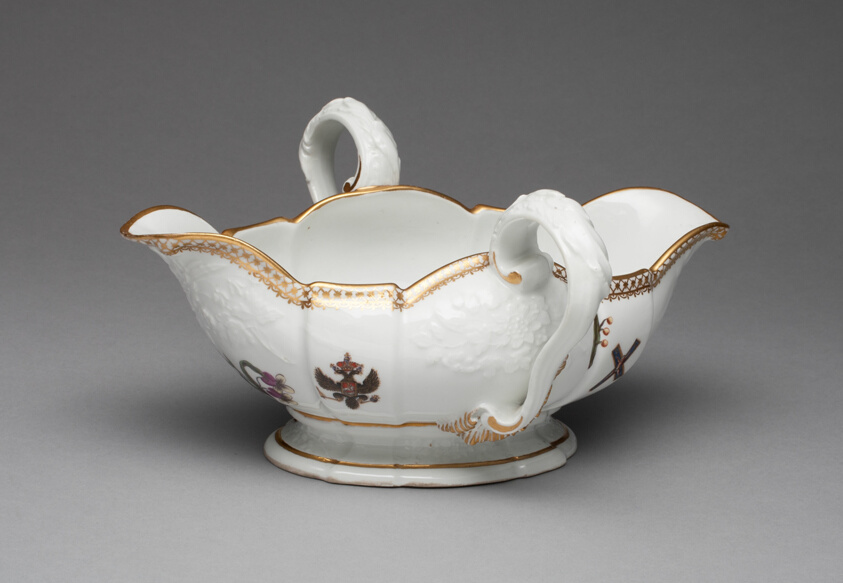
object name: Ceramics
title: Sauceboat from the St. Andrew Service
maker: Meissen Porcelain Manufactory (German, founded 1710)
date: 1744–55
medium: Hard-paste porcelain, polychrome enamels, and gilding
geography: Germany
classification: tableware; european decorative arts; ceramics